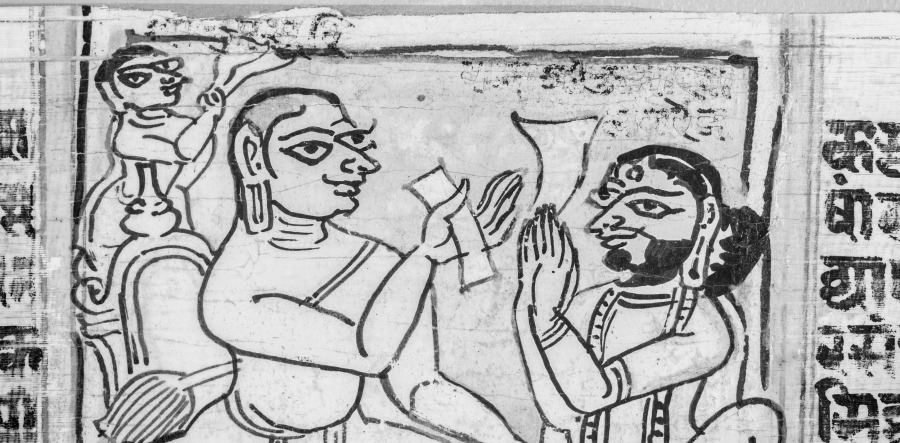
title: King Kumarapala Pays Reverence to Hemachandra: Folio 2 (recto), from a Great Poem about Twos (Dvyashraya Mahakavya) of Hemachandra with Commentary by Abhayatilaka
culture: Western India, Gujarat, possibly Patan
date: 1428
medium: Gum tempera and ink on palm leaf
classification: Painting